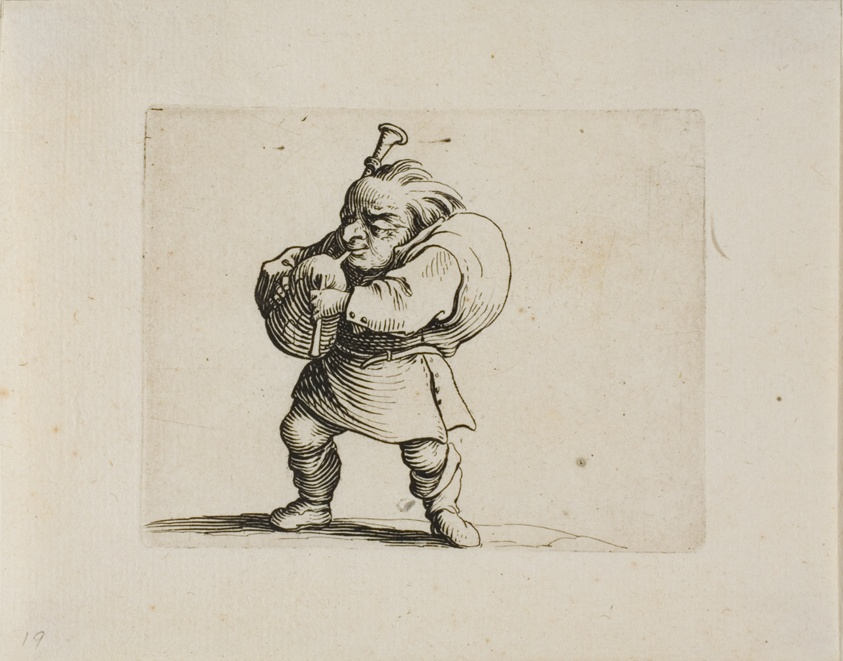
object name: Print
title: Bagpipe Player, from Varie Figure Gobbi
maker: Jacques Callot (French, 1592-1635)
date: 1616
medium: Etching on paper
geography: France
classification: etching; print; prints and drawing